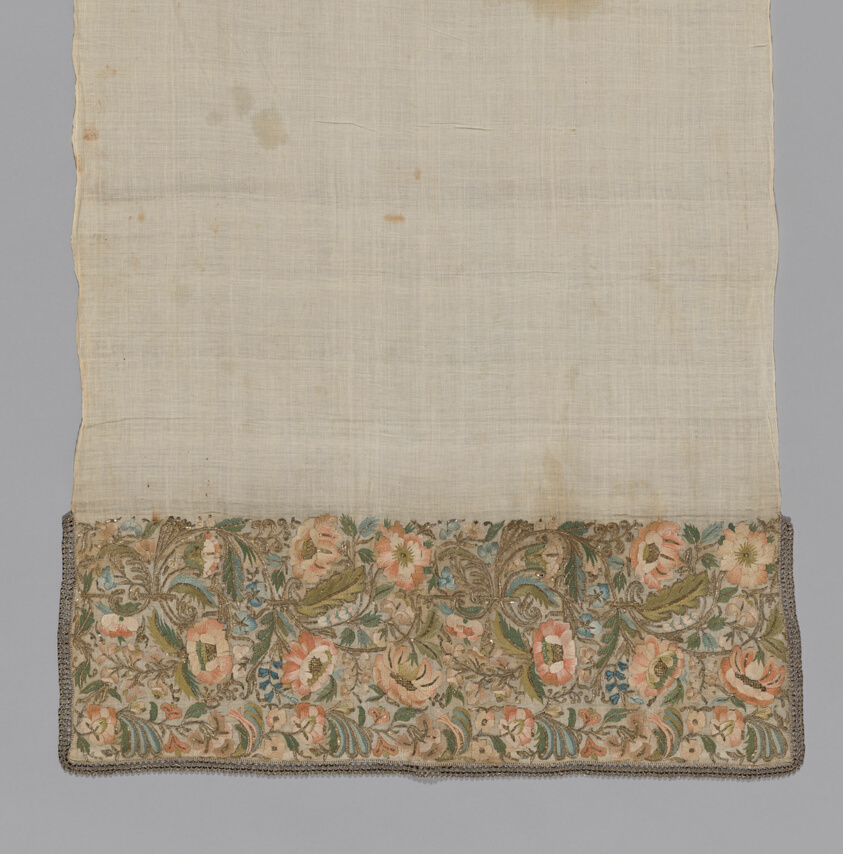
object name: Textile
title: Towel or Napkin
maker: Turkey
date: 1850/1900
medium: Embroidered in silk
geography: Turkey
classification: textile; needlework (visual works); weaving